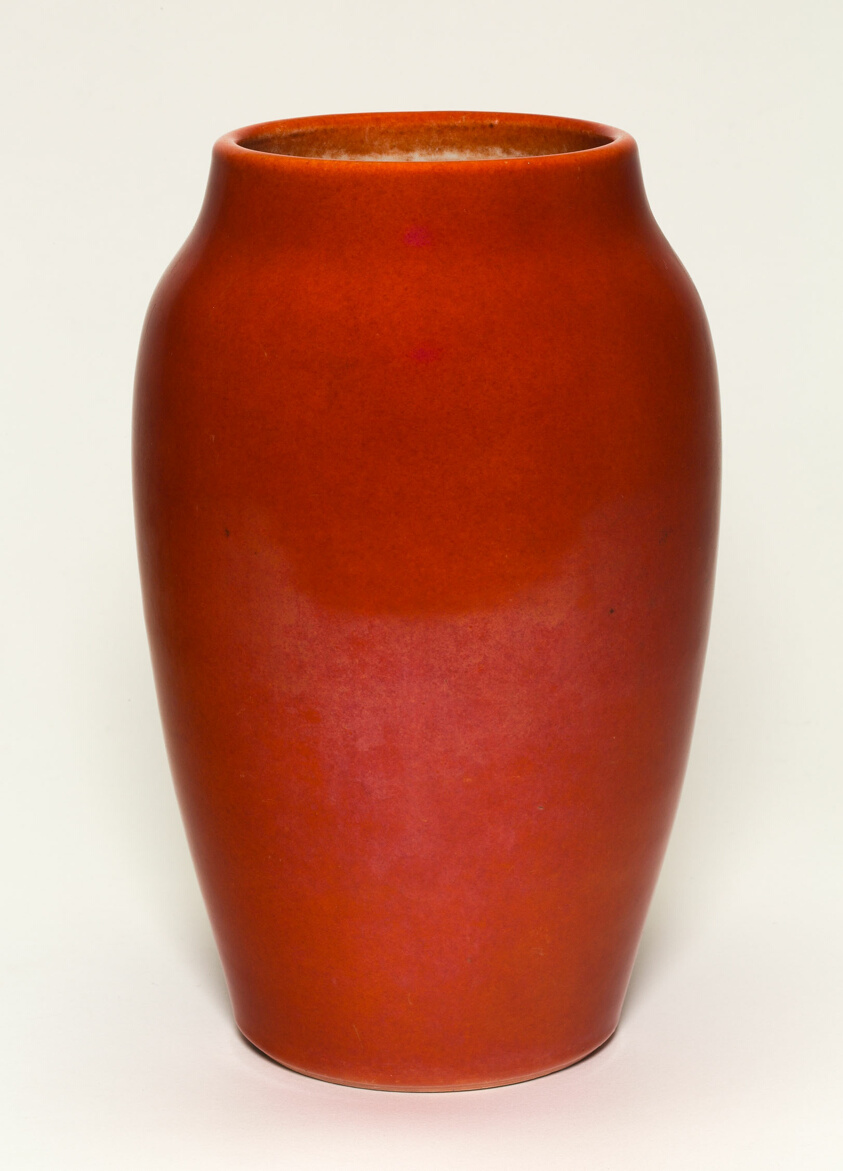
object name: Vessel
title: Coral-Glazed Vase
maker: China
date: Qing dynasty (1644–1911), c. 19th century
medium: Porcelain with red glaze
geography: China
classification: porcelain; asian art; ceramics